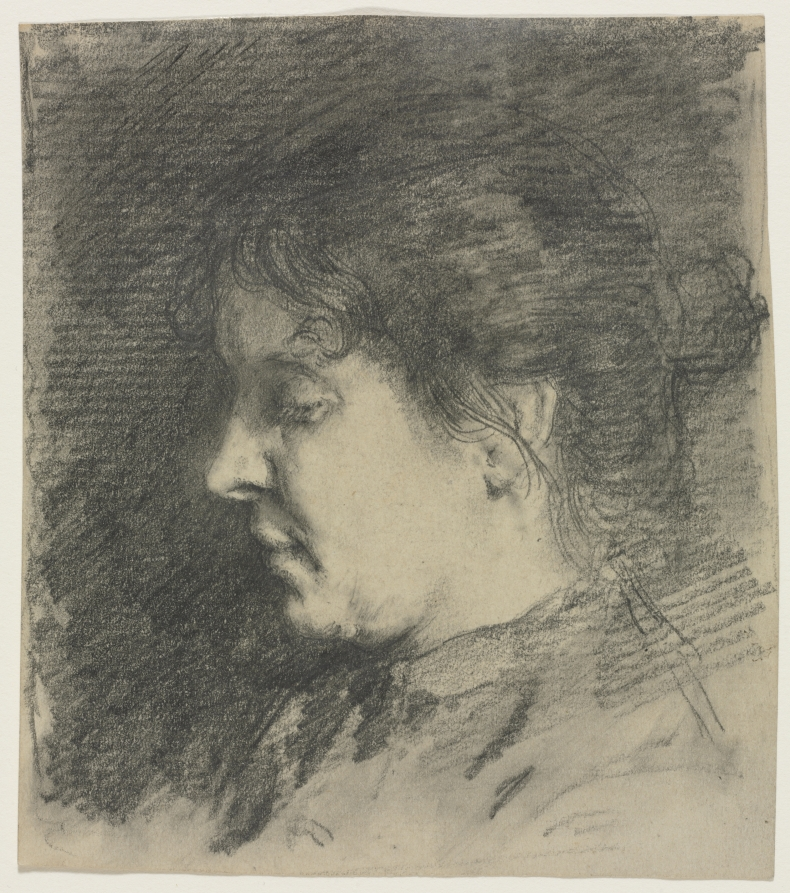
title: Sarah H. Crone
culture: America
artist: Samuel H. Crone (American, 1858–1913)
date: 1880s or 1890s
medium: graphite and black chalk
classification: Drawing